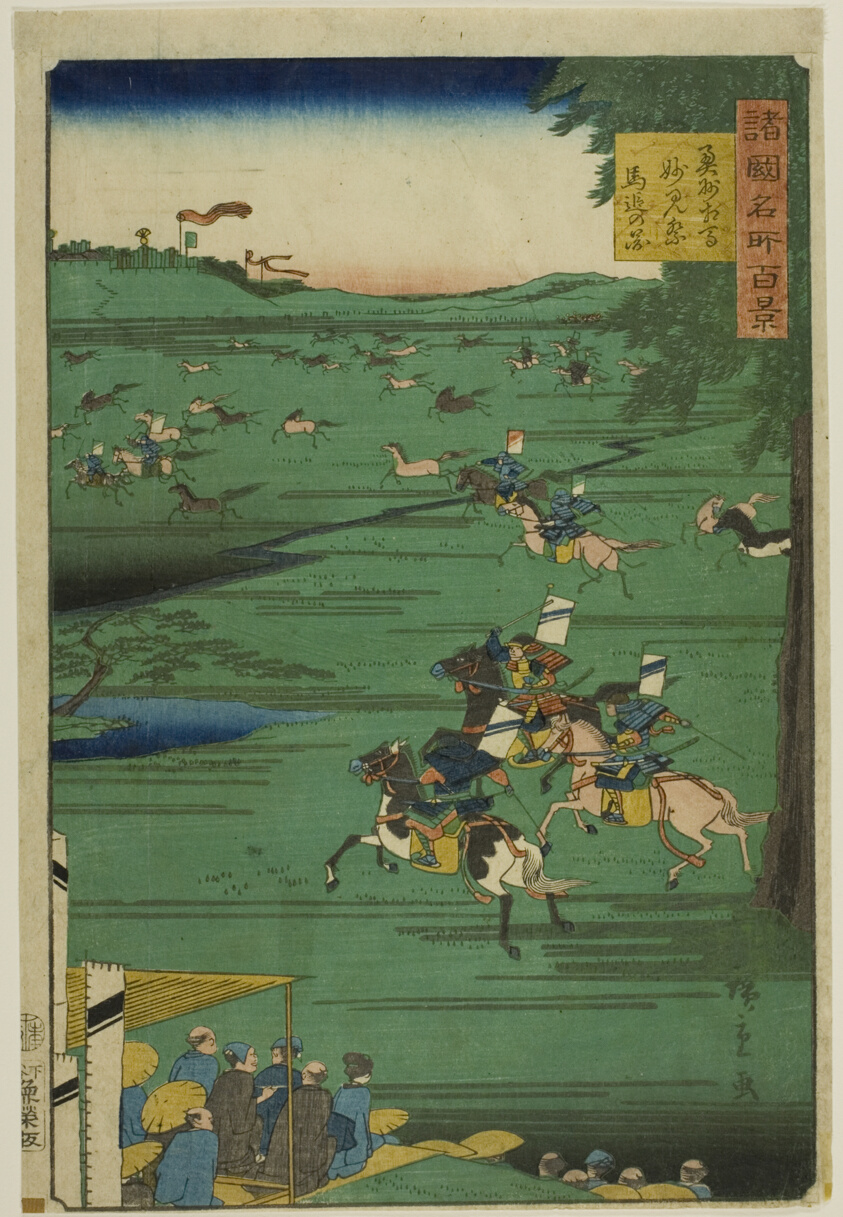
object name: Print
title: Image of the Horse Chase at the Myoken Festival, Soma, Oshu Province (Oshu Soma Myoken matsuri umao no zu) from the series “One Hundred Famous Views in the Various Provinces (Shokoku meisho hyakkei)”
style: Japanese (culture or style)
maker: Utagawa Hiroshige II (Shigenobu) (Japanese, 1826–1869)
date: 1859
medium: Color woodblock print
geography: Japan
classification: woodblock print; print